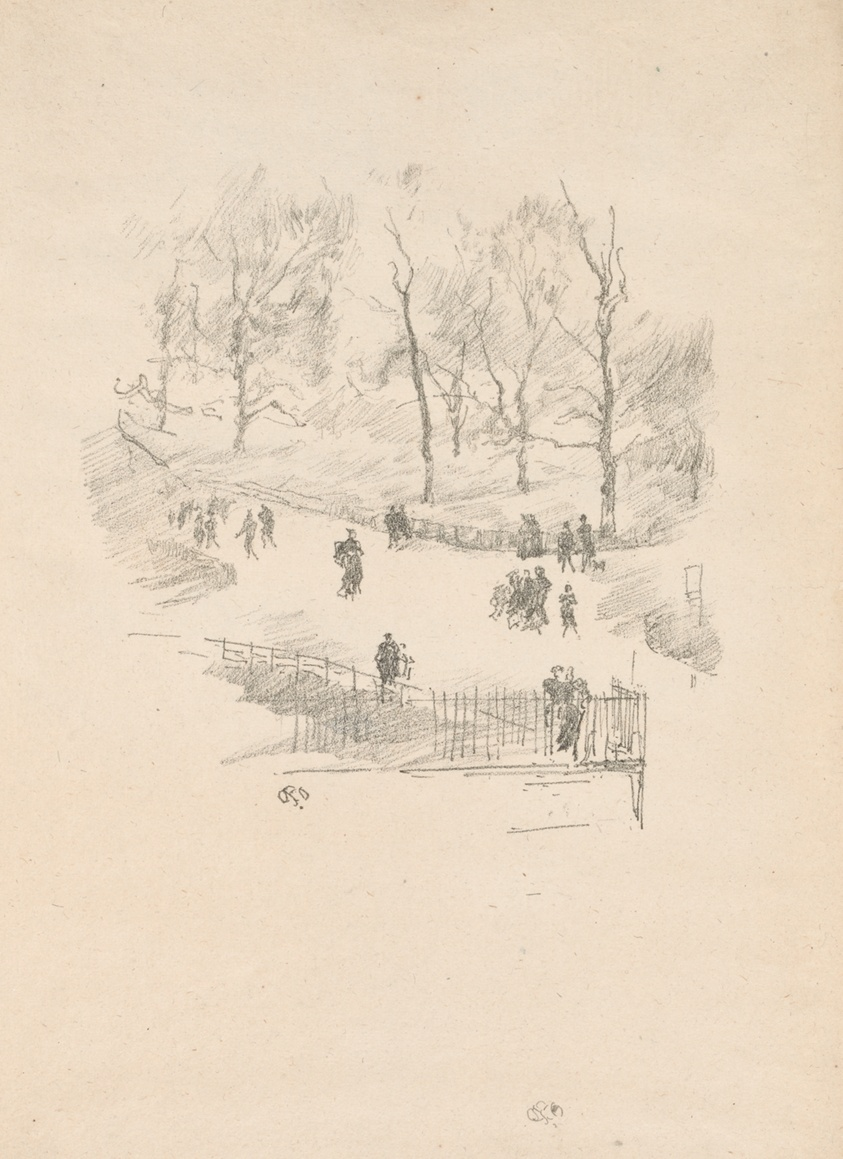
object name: Print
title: Kensington Gardens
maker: James McNeill Whistler (American, 1834-1903)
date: 1896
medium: Transfer lithograph in black on grayish ivory wove paper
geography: United States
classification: transfer lithograph; lithograph; print; prints and drawing; paper